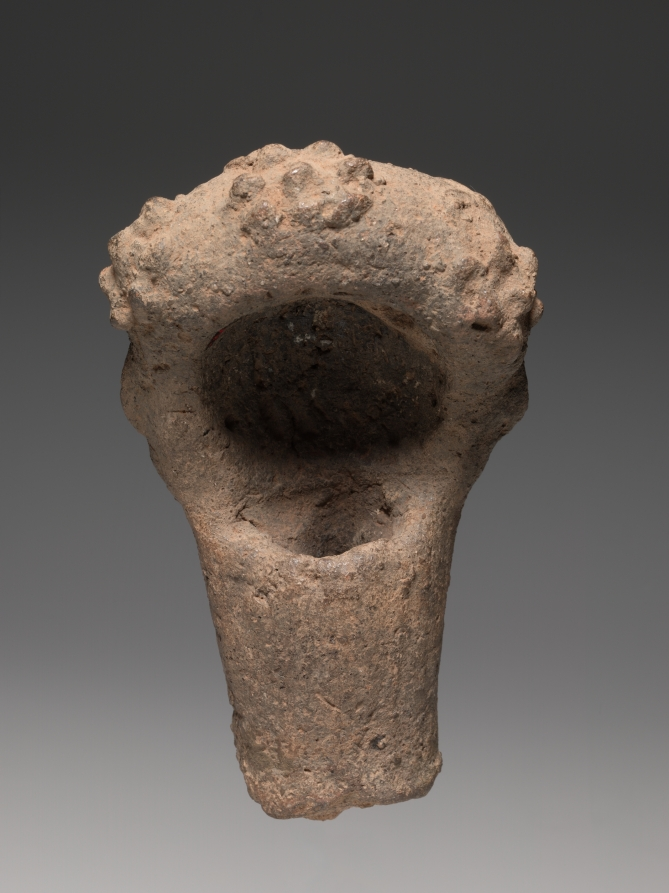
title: Figure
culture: Africa, West Africa, Ghana, Akan-style artist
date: 1800s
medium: Terracotta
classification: Sculpture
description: A master female potter among the Asante created this clay sculpture to commemorate the departed. While not a naturalistic portrait, this figure depicts features associated with the dead person such as coiffure or facial marks. The rolls of flesh on the neck are a widespread artistic convention for beauty, prosperity, and well-being. After placing the memorial in a sacred forest clearing, family members invoked the spirit of the departed and asked it to accept the sculpture and facilitate communications with ancestors.